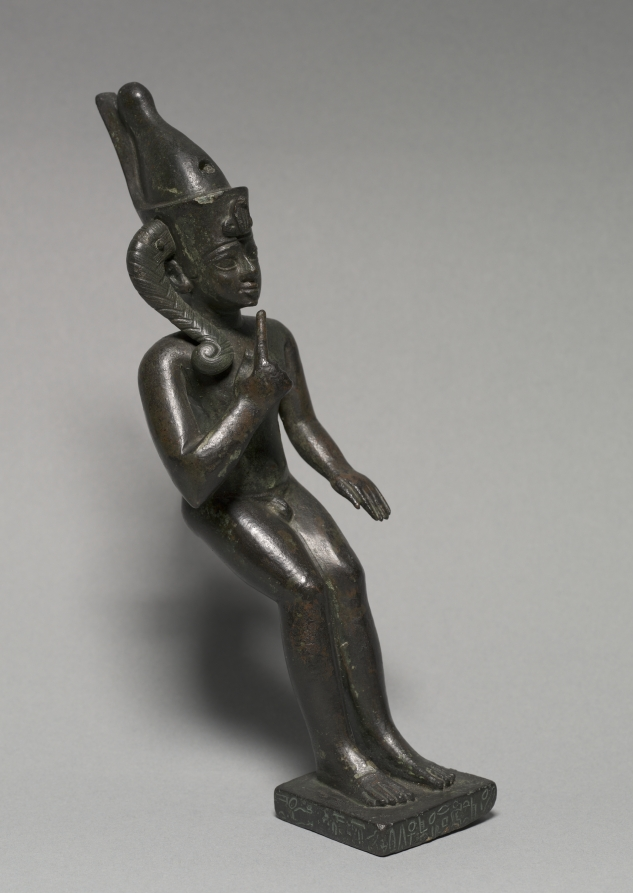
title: Statuette of Harpocrates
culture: Egypt, Greco-Roman period (332 BCE–395 CE), Ptolemaic dynasty (305–30 BCE)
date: 304–30 BCE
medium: bronze, solid cast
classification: Sculpture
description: Horus the Child (Harpocrates) was always shown in the childish attitude of holding a finger to his mouth.